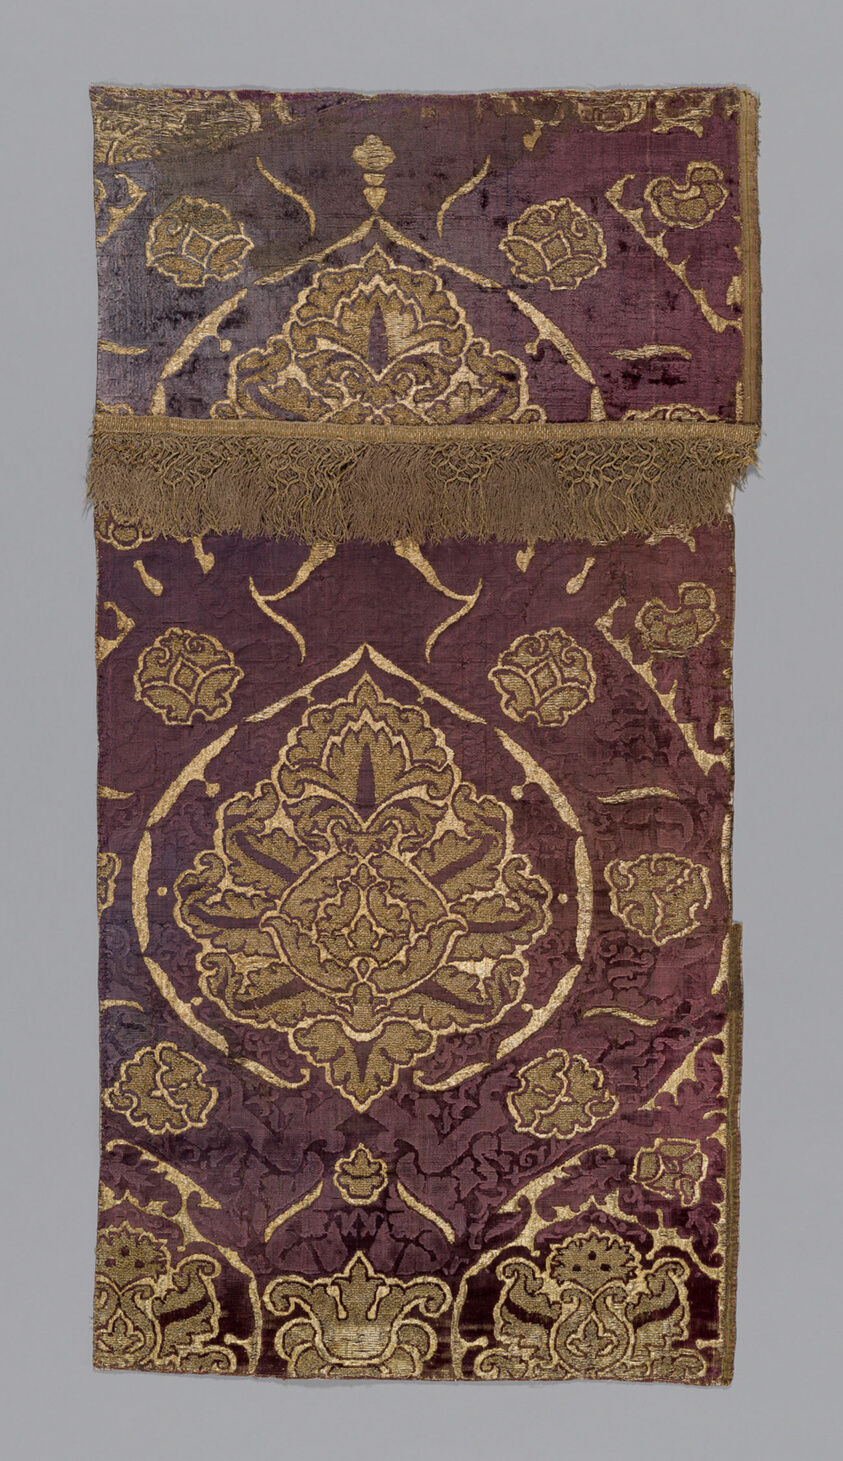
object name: Textile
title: Panel from an Altar Frontal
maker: Italy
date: 1450/1500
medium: Silk, warp-float faced 3:1 broken twill weave with weft-float faced 1:3 'Z' twill interlacings of secondary binding warps and gilt-metal-strip-wrapped silk supplementary facing wefts forming weft loop pile in areas and with supplementary pile warps forming cut, pile-on-pile, voided velvet; band of silk and gilt-metal-strip-wrapped silk; plain weave with supplementary patterning wefts and extended ground and supplementary patterning weft wrapped cut and uncut fringe; lined with cotton, plain weave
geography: Italy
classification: weaving - velvet; liturgical; textile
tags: pomegranates